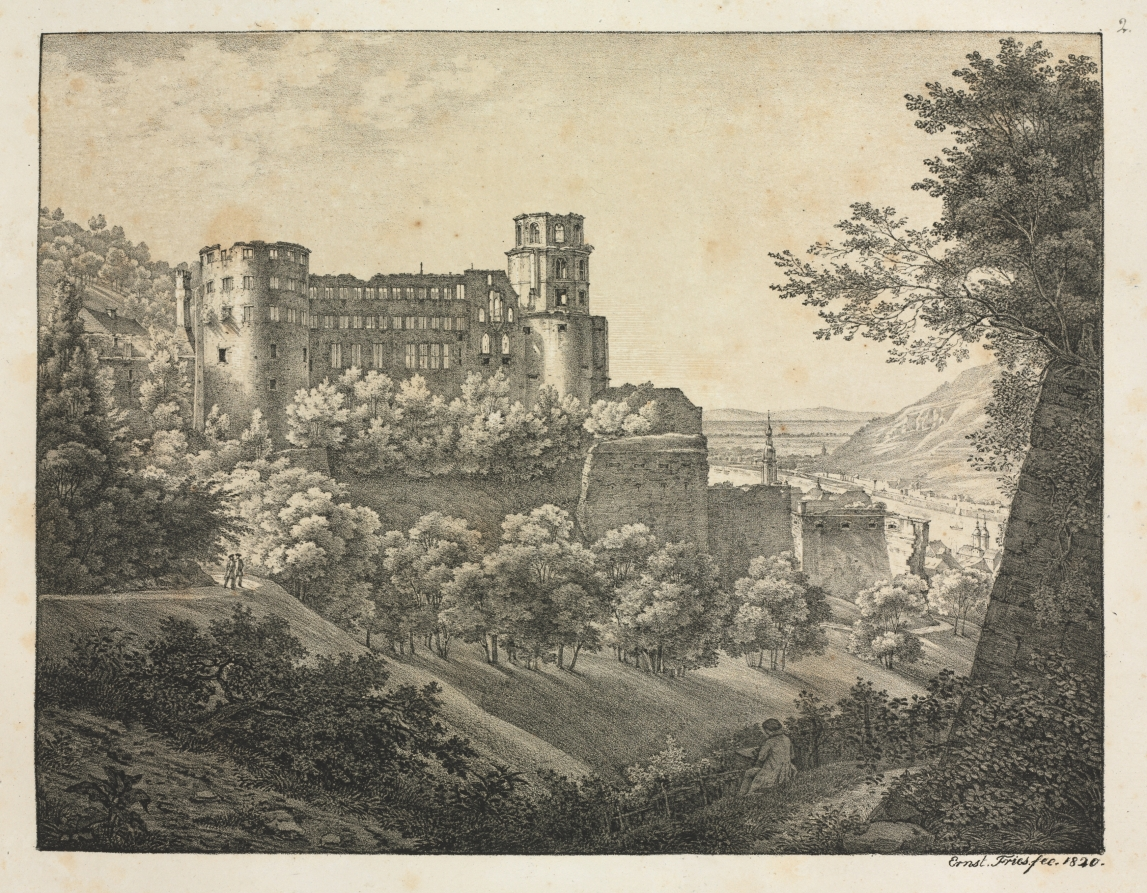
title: Six Views of Heidelberg Castle: Towards Northeast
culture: Germany, 19th century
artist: Ernst Fries (German, 1801–1833)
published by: Mohr & Winter, Heidelberg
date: 1820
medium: lithograph printed in black with two tint stones: deep ochre overall and gray selectively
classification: Print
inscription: In print: Das Schloss zu Heidelberg gegen Nord Osten Inscribed in graphite upper right corner: 1